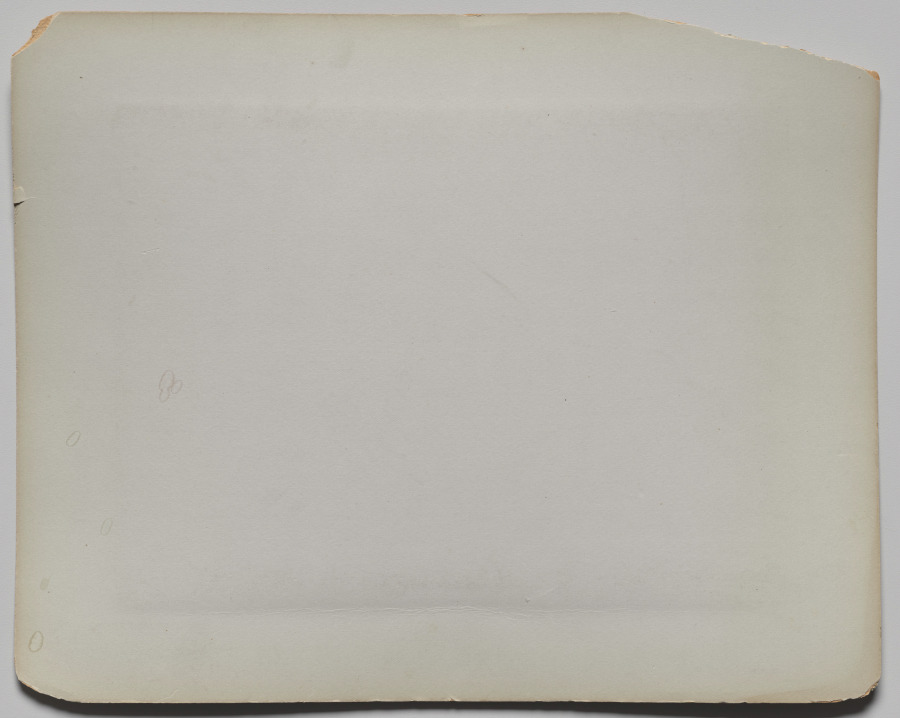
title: Hong Lim Green, Singapore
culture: England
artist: London Stereoscopic and Photographic Company (active, 1854–1922)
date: c. 1887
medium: albumen print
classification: Photograph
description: The Chinese were the largest ethnic group in Singapore, which became a British crown colony in 1867. The land for the public park seen here was donated by the eminent Chinese businessman Cheang Hong Lim in 1876. In 1887 the Straits Chinese Recreation Club built the octagonal building in the center of the park to serve as its clubhouse. Over 100 Chinese and European gentlemen were invited to its opening. The club used the green for English outdoor sports such as lawn tennis and cricket.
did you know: In 1858, the London Stereoscopic and Photographic Company offered over 100,000 topographical images for sale.